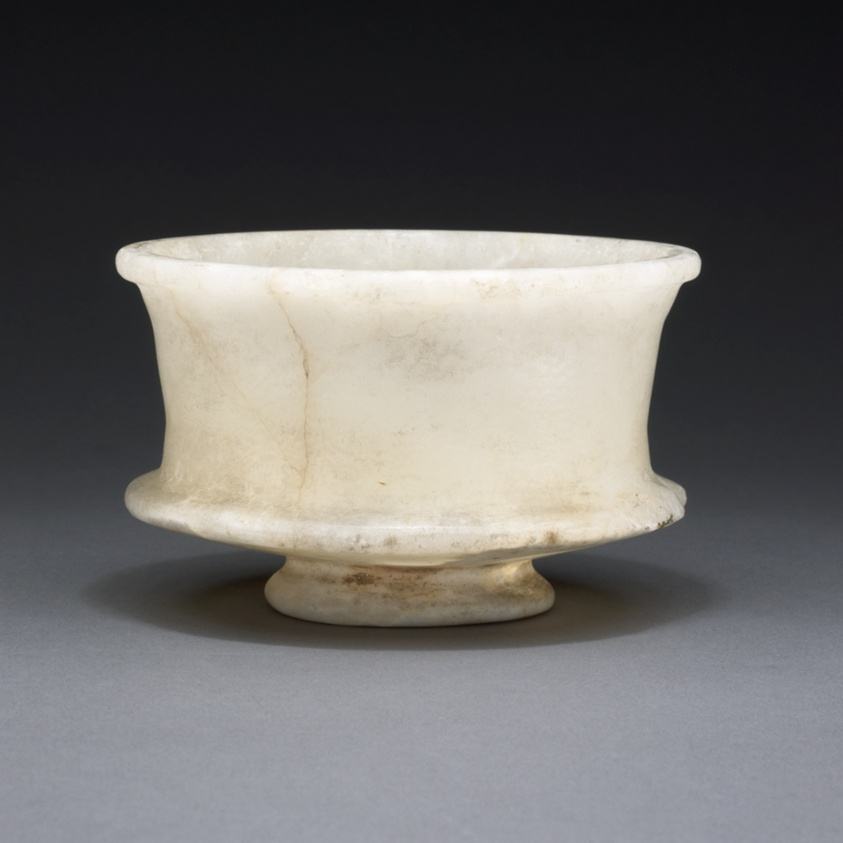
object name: Vessel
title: Ointment Vessel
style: new kingdom, ancient, egyptian, eighteenth dynasty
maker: Egyptian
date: New Kingdom, mid–Dynasty 18, about 1479–1352 BCE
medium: Travertine (Egyptian alabaster)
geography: Egypt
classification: personal grooming / hygiene / cosmetic container; stone; vessel; ancient art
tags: rituals, beauty